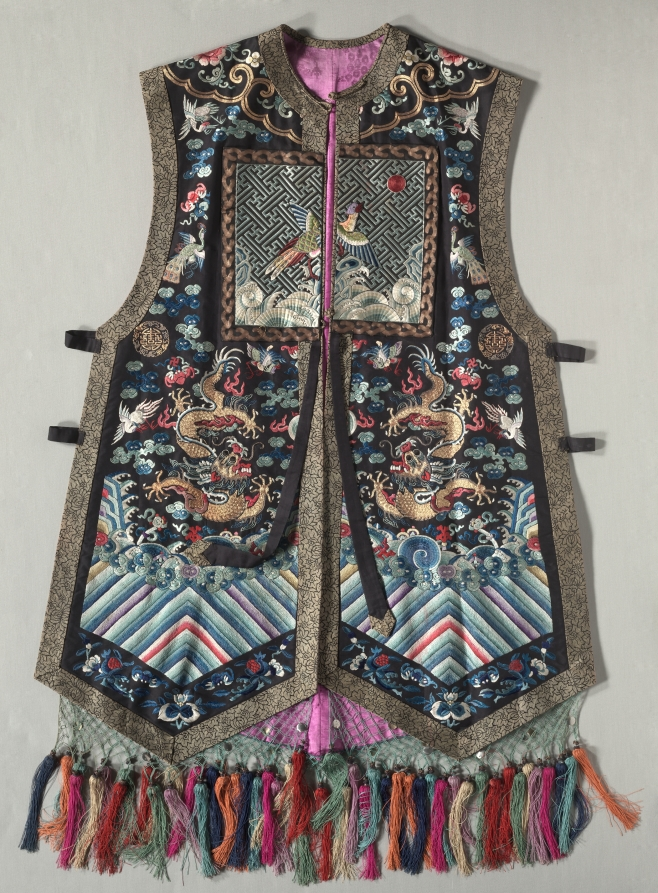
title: Woman's Bridal Dress, Tabard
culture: China, Qing dynasty (1644-1911)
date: 1800s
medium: Silk, gilt-metal thread; embroidery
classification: Garment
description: This three-piece bridal dress includes a dragon jacket, pleated skirt, and tabard, a short loose-fitting sleeveless vest. The ensemble reveals the high rank of her husband even though it did not fall under the scope of the Qing Dynasty sumptuary laws. The three-quarter-length sleeveless tabard completes the outfit, with a front closure, open sides secured by cloth bands, and a colorful tasseled fringe around the hem. Dragons, water, and clouds are embroidered on the silk ground.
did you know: A rank badge applied on the front and back shows that the bride married a man of high official rank.